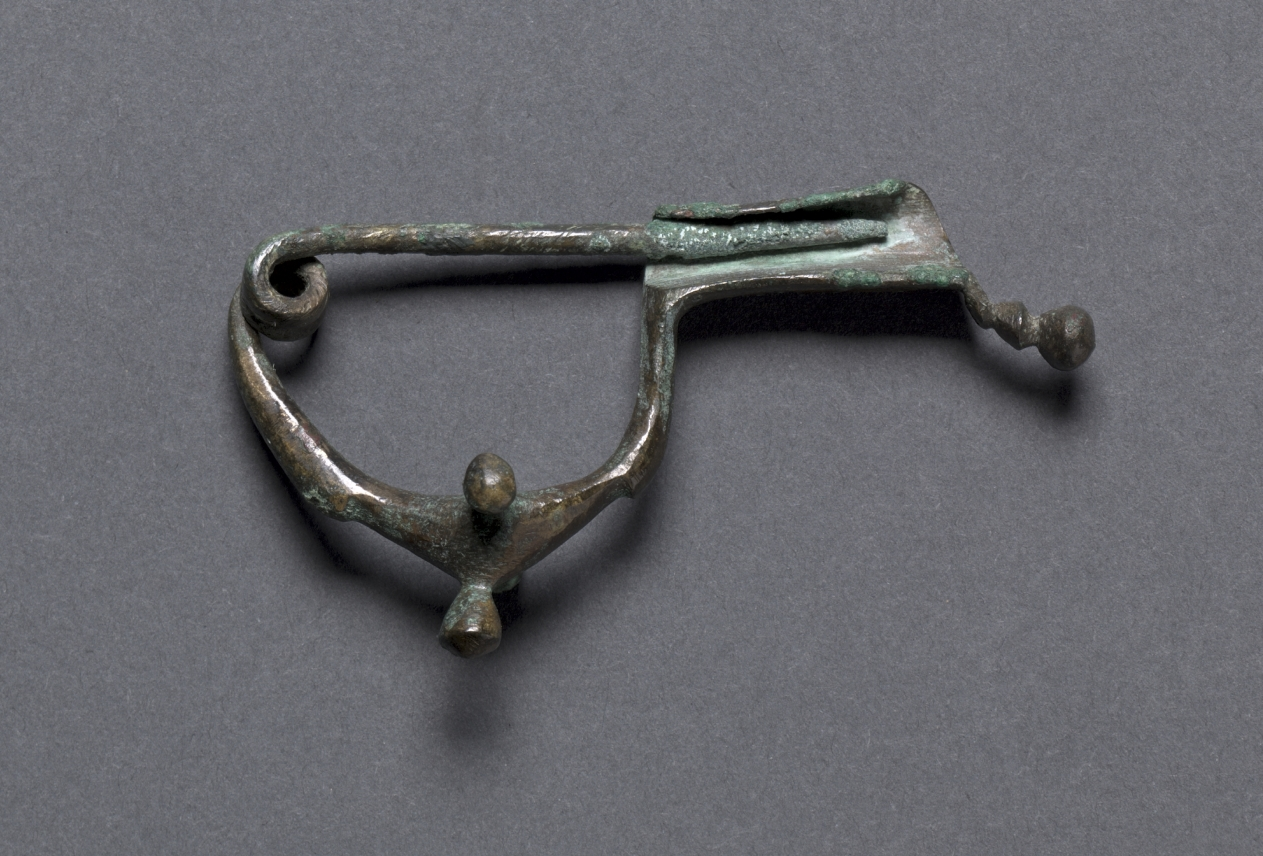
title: Fibula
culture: Etruscan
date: c. 600 BCE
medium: bronze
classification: Jewelry